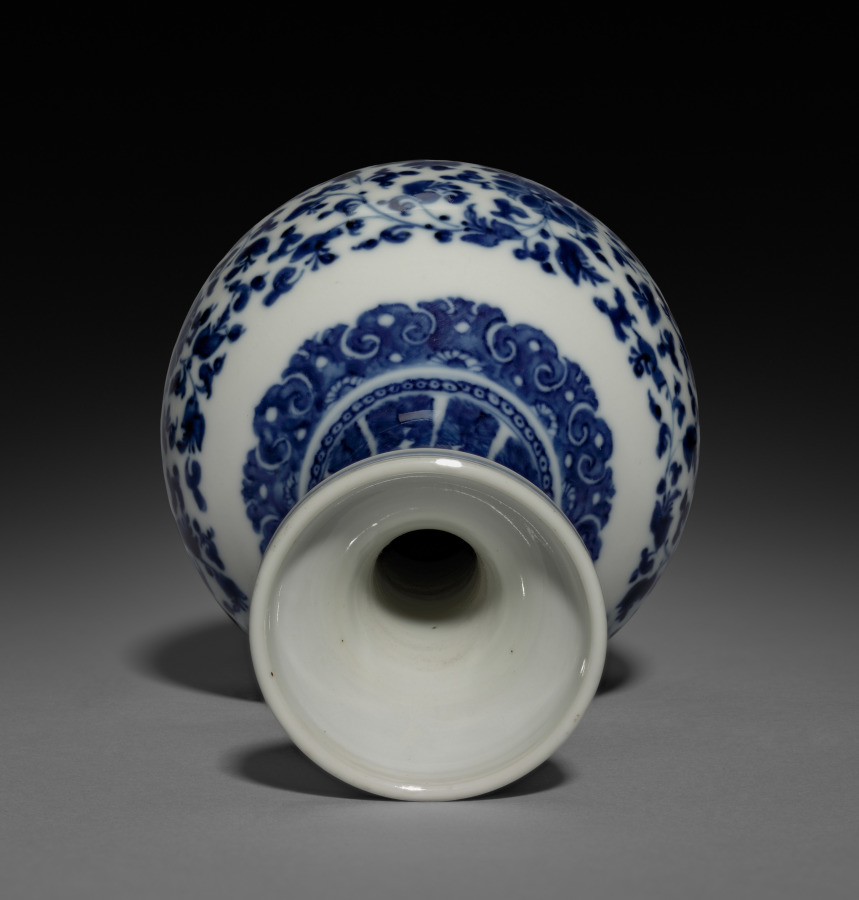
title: Globular Vase with Long Neck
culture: China, Qing dynasty (1644-1911), Kangxi reign (1661-1722)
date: 1661–1722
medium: porcelain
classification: Ceramic